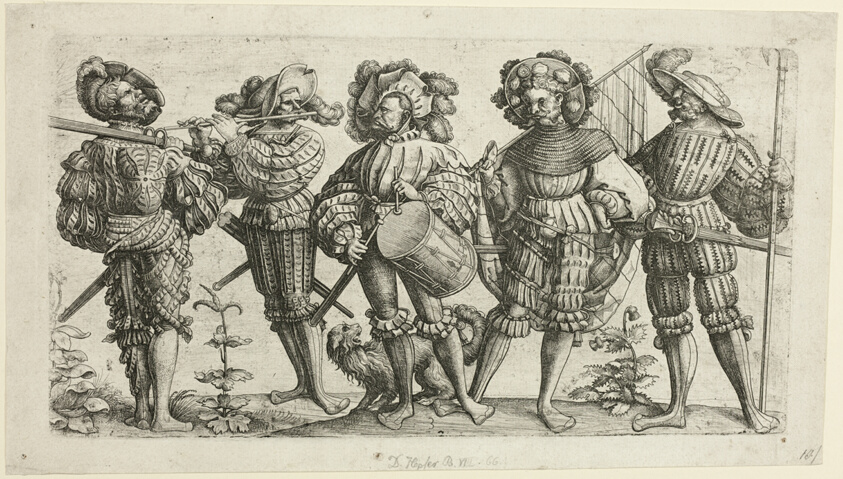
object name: Print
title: Five German Soldiers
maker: Daniel Hopfer the Elder; German, 1470-1536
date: 1505/36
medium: Etching in black on buff laid paper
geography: Germany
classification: etching; print; prints and drawing